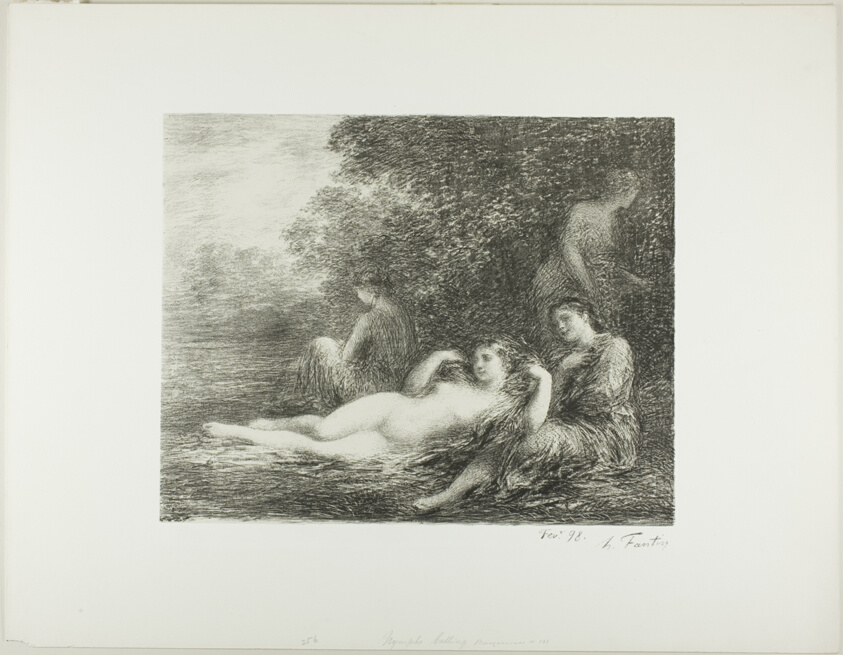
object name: Print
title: Bathing Women, fourth large plate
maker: Henri Fantin-Latour (French, 1836-1904)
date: 1898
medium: Lithograph in black on ivory China paper, laid down on white wove paper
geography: France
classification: lithograph; print; prints and drawing